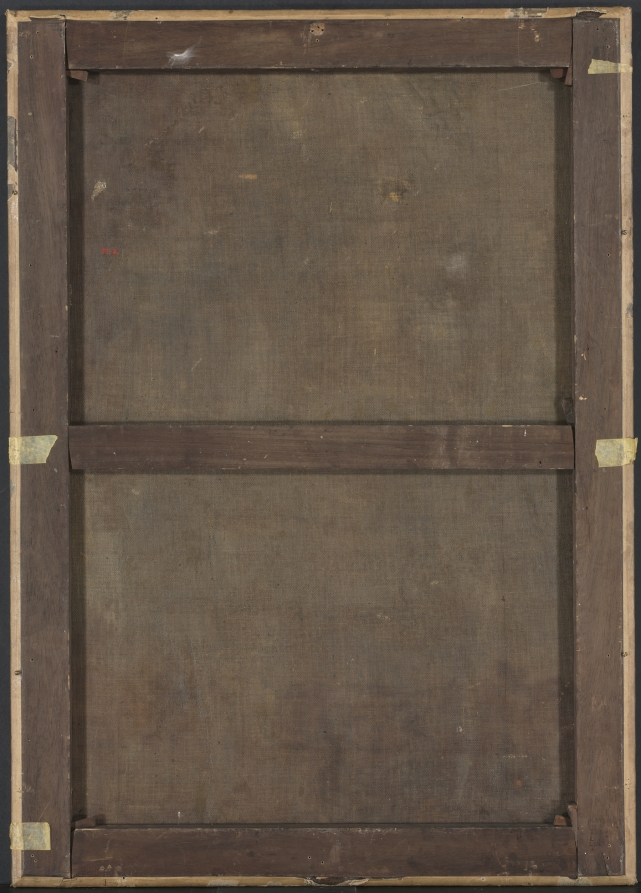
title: Return to Nazareth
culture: Italy, 18th century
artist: Francesco Conti (Italian, 1681–1760)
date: 1735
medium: oil on canvas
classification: Painting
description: Upon hearing rumor of a young king born to a virgin in Bethlehem, Herod, the ruler of Judea, jealously developed a plot to find and murder the infant Jesus. Fearing Herod's wrath, the Holy Family escaped to Egypt and eventually returned to Palestine-an echo of the great Exodus of the Old Testament. Conti trained in Rome but eventually made his career in Florence. Even given the pale colors, balletic poses, and attenuated forms, the sharp contrasts of dark and light, with figures emerging from deep shadow, attests to the long shadow of Caravaggio even in Florence a century later.